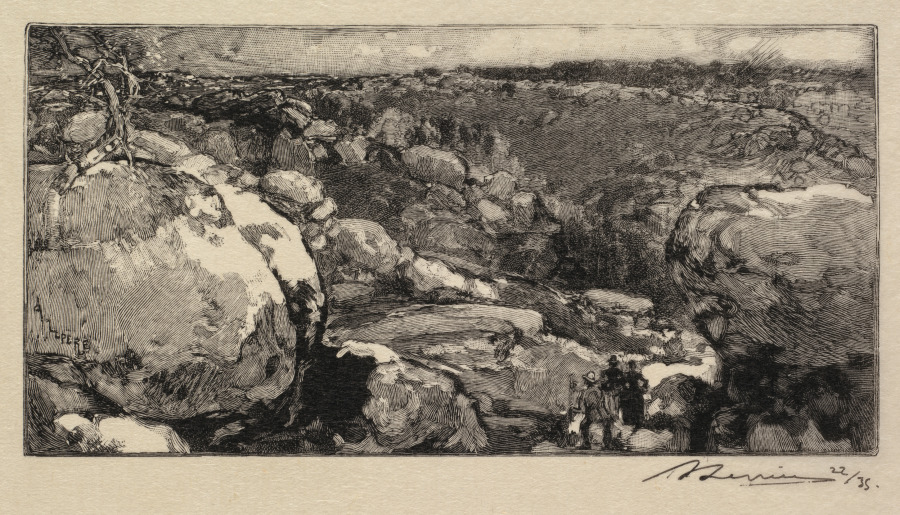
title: Fontainebleau Forest: The Cirque of Long-Rocher (La Forêt de Fontainebleau: Le cirque du Long-Rocher)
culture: France, 19th century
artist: Auguste Louis Lepère (French, 1849–1918)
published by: A. Desmoulins, Published in Revue Illustrée, 1887–90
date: 1888 (block engraved when reproduced in Revue Illustrée 1888), published 1908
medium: wood engraving from bound volume of 34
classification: Bound Volume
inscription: In block, lower left: A. LEPÈRE; below image, lower right, in black ink: ALepère 22/35; on window mat, lower right, in graphite: Le cirque du Long-Rocher